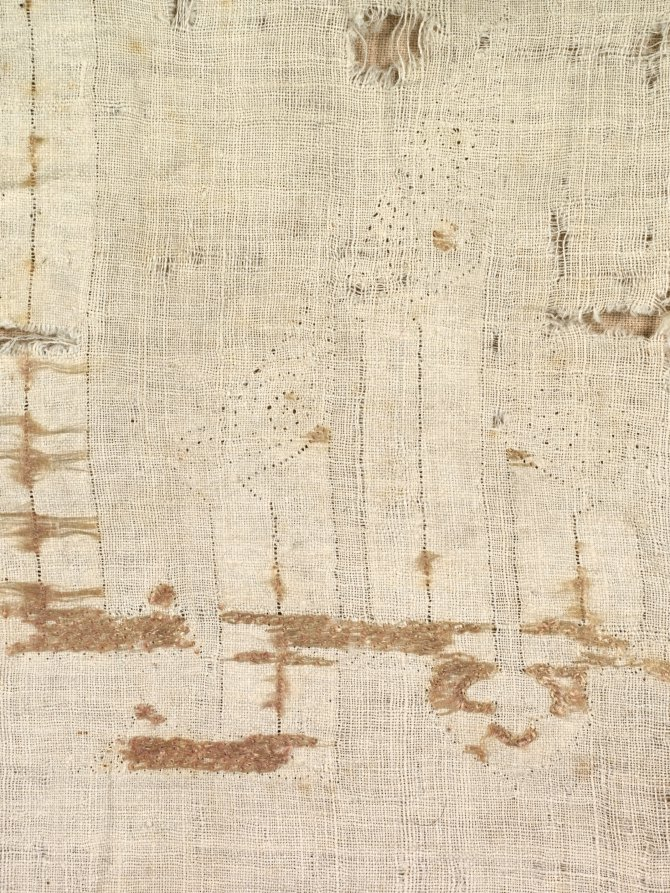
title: Tiraz of Caliph ‘Abd al-Rahman III, from the reliquary of Santa Librada, Cathedral of Seqüenza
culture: Spain, Cordoba, Spanish Umayyad period (756–1031)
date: 941–42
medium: Linen; silk: embroidery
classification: Embroidery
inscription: only the traces of a very large-scale elaborately foliated Kufic inscription preserved, largely in the form of needle holes but with a few small areas where the stitches are intact. This is approximately the second half of the original full inscription, which measured well over two meters long; the bulk of the original textile with the first half of the inscription was formerly preserved in the Cathedral of Siquenza. As preserved on the two fragments, the full inscription reads: "[Commander of the Be]lievers al-Masir li-Din al-Muslimin, may God support him! That which was made through the agency of Durri, his servant, in the year thirty and three hundred."